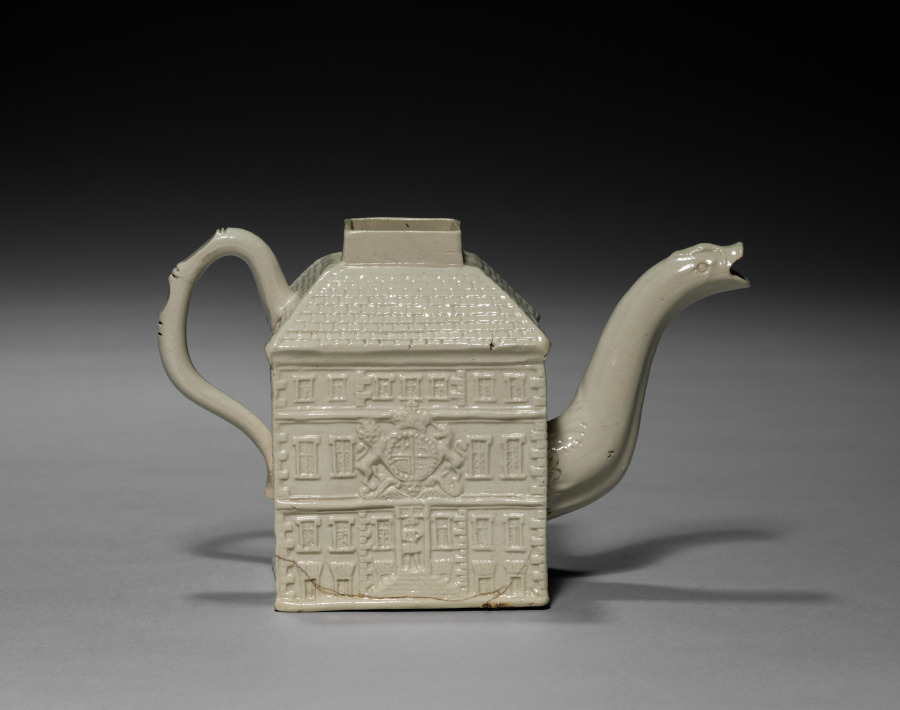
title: Teapot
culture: England, Staffordshire, 18th century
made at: Staffordshire Factory (British)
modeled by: Aaron Wood (British)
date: 1740–1750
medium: salt-glazed earthenware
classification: Ceramic